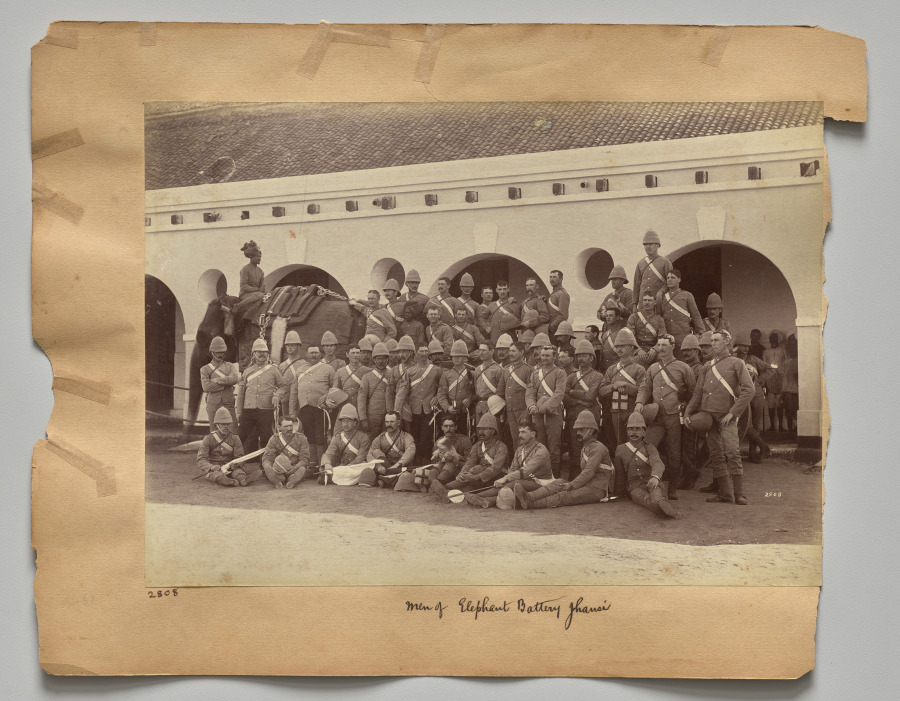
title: Men of Elephant Battery, Jhansi (verso)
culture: India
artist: Raja Deen Dayal (Indian, 1844–1905)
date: c. 1882–87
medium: albumen print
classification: Photograph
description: These photographs are part of an album, now disassembled, of around 105 photographs taken in India between 1885 and summer 1887 that provide glimpses into the lives of the British colonial elite and royal and upper-class Indians. The museum holds another group of 37 pictures from this album (2016.266), which was probably commissioned by a British civil servant visiting or working in India around 1888 as a personal souvenir of his experiences there.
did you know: Raja Deen Dayal is regarded now, and was considered during his lifetime, to be India’s most important 19th-century photographer.